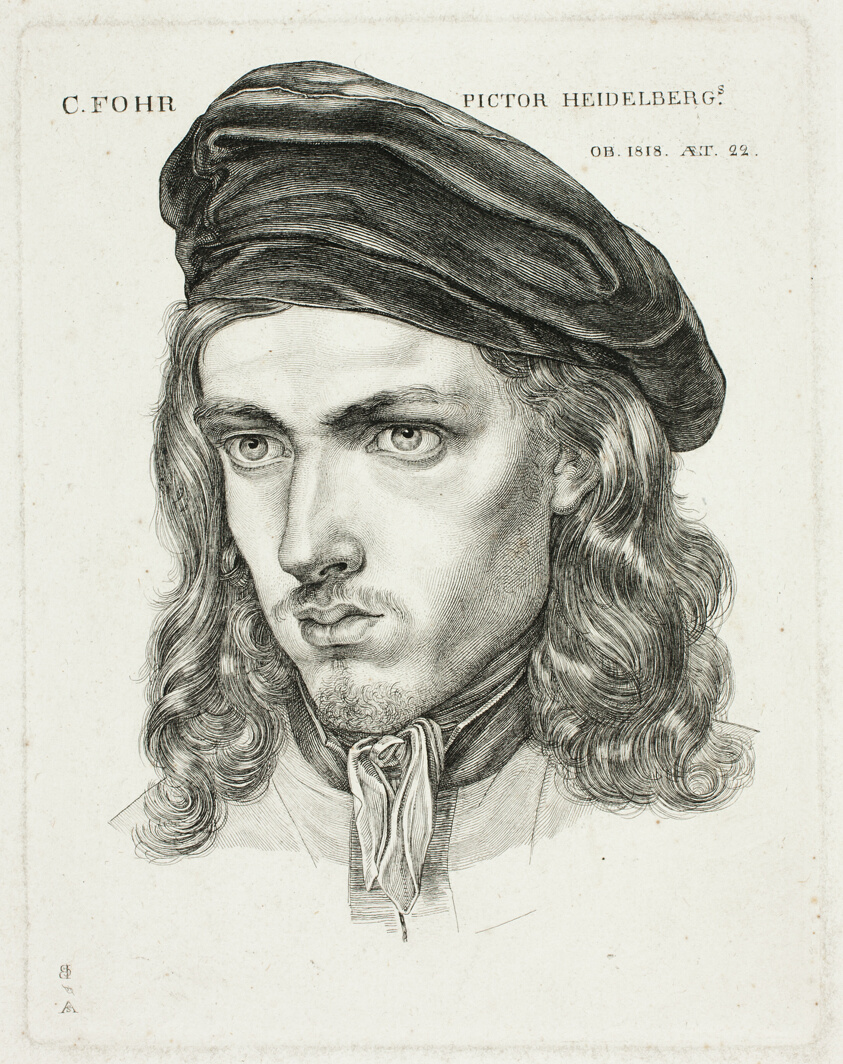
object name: Print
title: Portrait of Karl Philip Fohr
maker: Samuel Amsler (Swiss, 1791-1849); after Carl Barth (German, 1896-1976)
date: 1818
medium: Engraving on off-white wove paper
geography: Switzerland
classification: engraving; print; prints and drawing